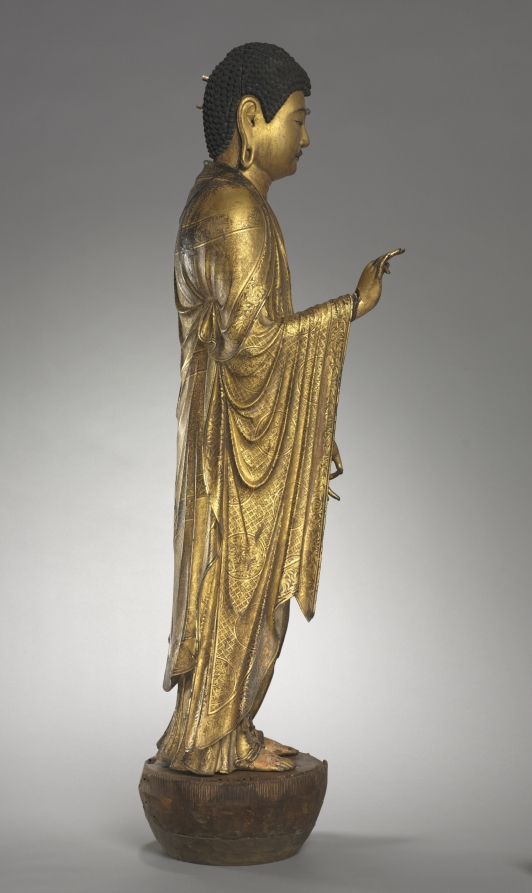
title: Buddha of Infinite Life and Light (Amida Nyorai)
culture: Japan, Kamakura period (1185–1333)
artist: Kōshun (Japanese, active mid-1200s)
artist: assisted by Koshin (Japanese, active mid-1200s)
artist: assisted by Joshun (Japanese, active mid-1200s)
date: 1269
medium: Cypress with lacquer, color, gold, cut gold, rock-crystal inlaid eyes, and quartz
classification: Sculpture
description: This ornate Buddha Amida stands in a posture of welcome, greeting the dying who will accompany him back to his Pure Land. Documents inserted into the sculpture’s hollow core around the time of its creation include a copy of the sacred text Amida Sutra, a register of donors who desired to be joined together in generating karmic merit (kechien) through the creation and dedication of the sculpture, and a record asserting that the image was completed over the course of 33 days in 1269 at Shitennōji Temple in Osaka.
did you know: The lead sculptor was Kōshun, who had been granted the lofty title “Bridge of the Law.”